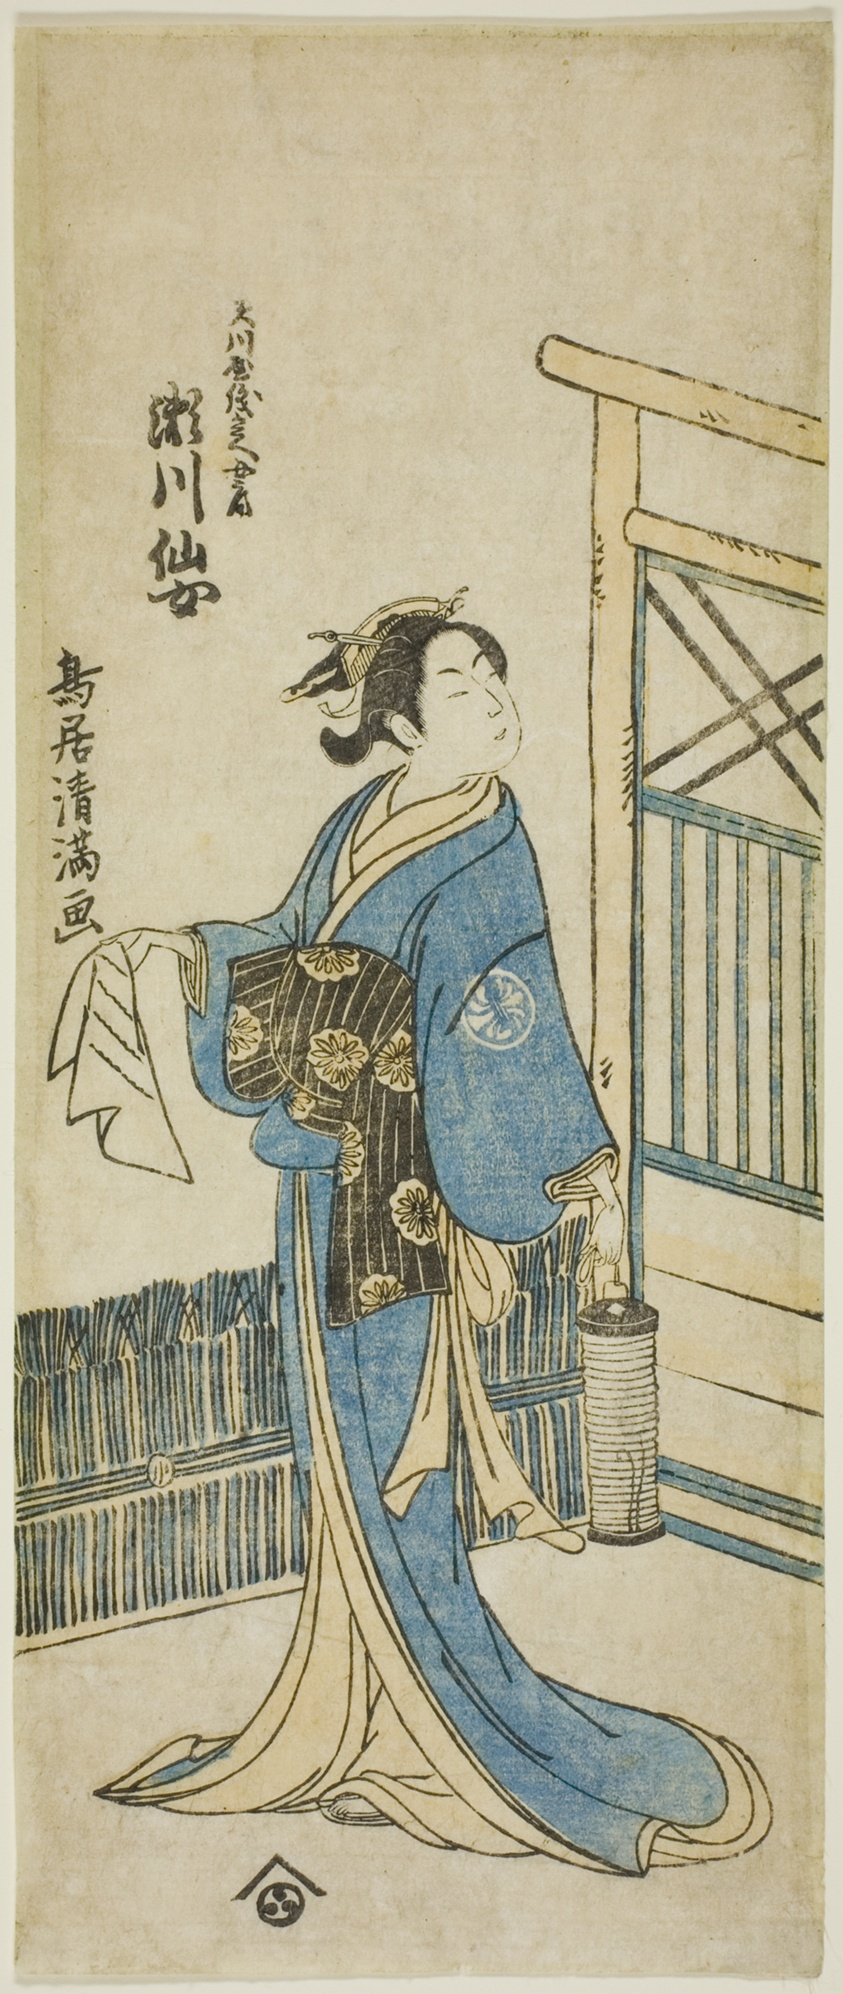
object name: Print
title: The Actor Segawa Senjo (Kikunojo III) as the wife of Amakawaya Gihei in the play "Kanadehon Chushingura," performed at the Nakamura Theater in the fifth month, 1776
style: Japanese (culture or style)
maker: Torii Kiyomitsu I (Japanese, 1735–1785)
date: 1776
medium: Color woodblock print; hosoban, benizuri-e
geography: Japan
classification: woodblock print; print; asian art